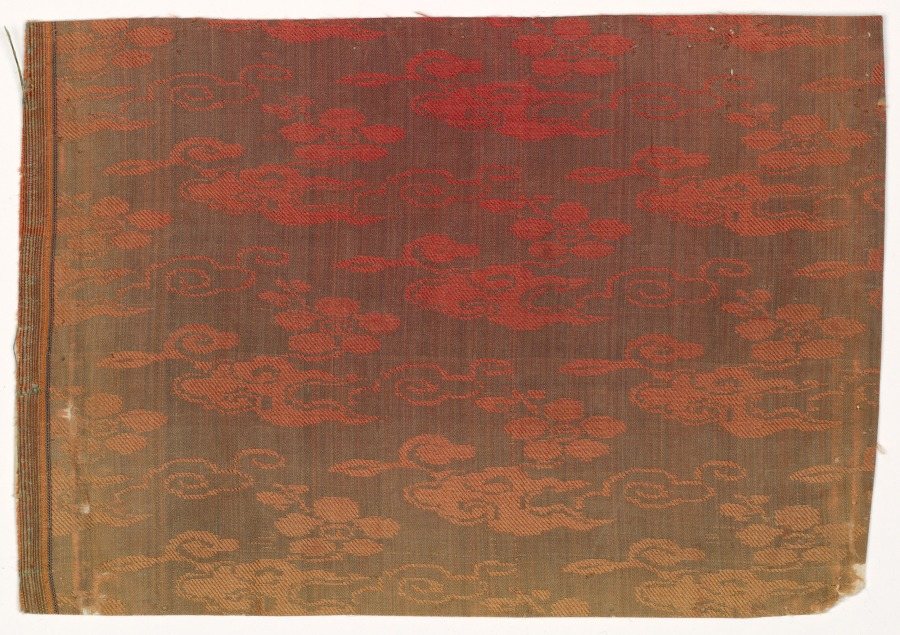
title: Fragment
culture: China, 17th century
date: 1600s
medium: silk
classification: Textile